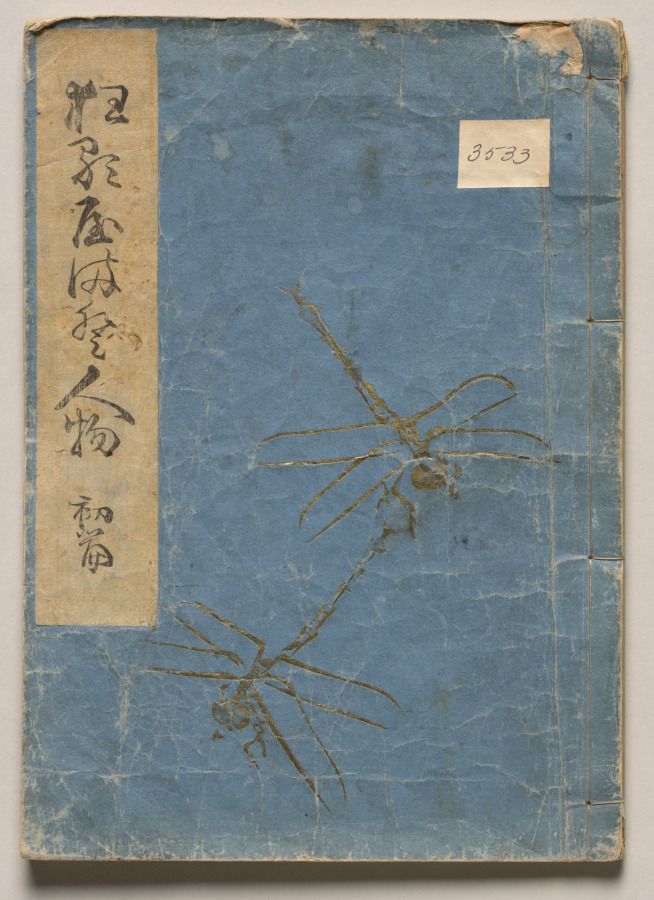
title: Volume One of People of Japan in Light Verse (Kyōka)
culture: Japan, Edo period (1615–1868)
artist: Utagawa Hiroshige (Japanese, 1797–1858)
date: 1857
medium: Woodblock-printed book; ink and color on paper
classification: Bound Volume